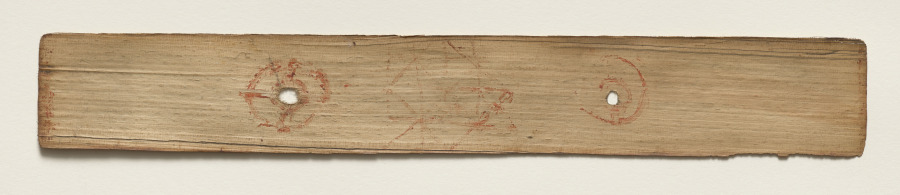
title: Leaf from a Buddhist Manuscript (verso)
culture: Sri Lanka, Singhalese, Late 17th century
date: c. 1700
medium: fiber paper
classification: Manuscript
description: Palm leaf material is still used for manuscripts in Sri Lanka. The palm leaves are prepared first by boiling them, drying them in the sun, and then rubbing them with oils. Scribes then use a metal stylus to incise the text. Then charcoal powder is wiped across the pages, filling in only the inscribed lines.